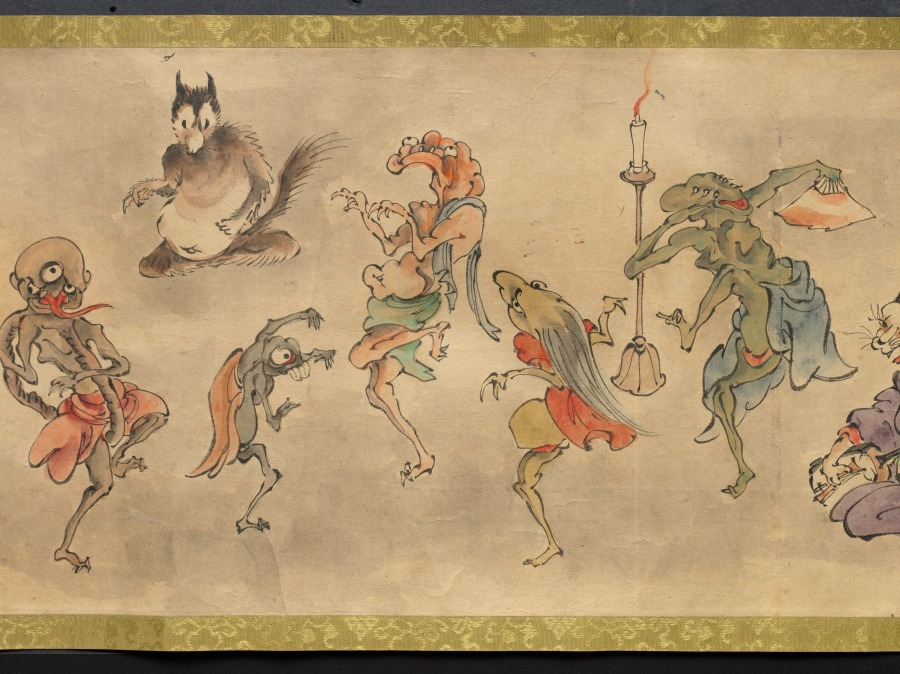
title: An Illustrated Marriage of Apparitions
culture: Japan, Edo period (1615–1868)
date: mid-1800s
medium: handscroll; ink and color on paper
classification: Painting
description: The matchmaking, engagement, wedding, and birth of the first child of two apparitions, or bakemono, literally "things that change," are illustrated in this whimsical, humorous handscroll. Japanese folklore abounds with such strange creatures, most famously represented in handscrolls featuring a procession of 100 supernatural monsters. Aside from a textual preface and cartouches indicating the content of the scenes, the tale is told visually. The artist and whereabouts of the original handscroll are unknown, but a number of other 19th-century copies by amateur painters exist in Japanese collections, attesting to its broad appeal.